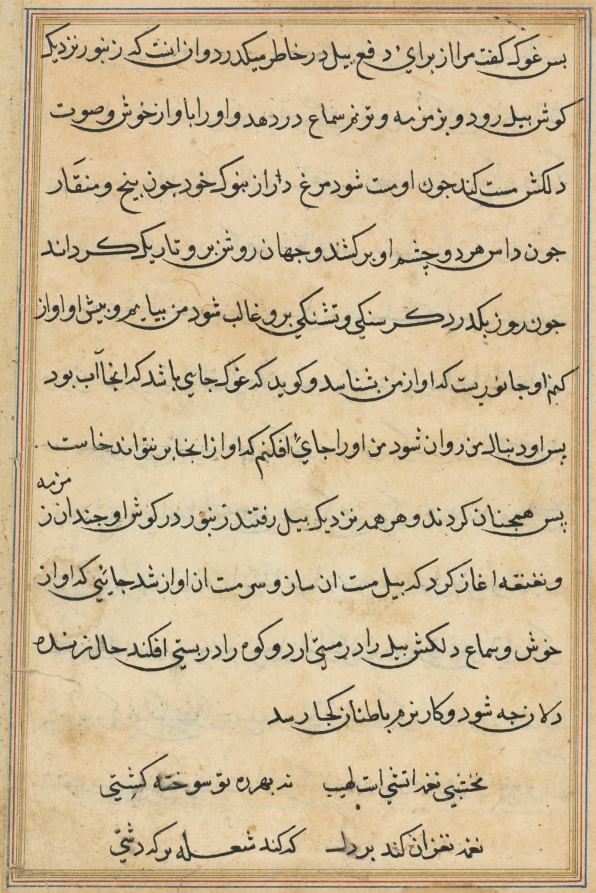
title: Page from Tales of a Parrot (Tuti-nama): text page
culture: Mughal India, court of Akbar (reigned 1556–1605)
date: c. 1560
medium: gum tempera, ink, and gold on paper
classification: Painting